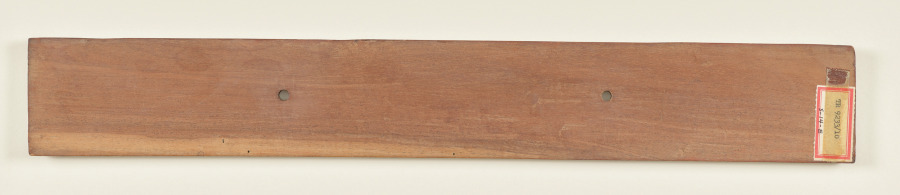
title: Bottom Cover for a Buddhist Manuscript (verso)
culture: Sri Lanka, Singhalese, Late 17th century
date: c. 1700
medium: Gum tempera on wood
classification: Manuscript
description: Palm leaf material is still used for manuscripts in Sri Lanka. The palm leaves are prepared first by boiling them, drying them in the sun, and then rubbing them with oils. Scribes then use a metal stylus to incise the text. Then charcoal powder is wiped across the pages, filling in only the inscribed lines.